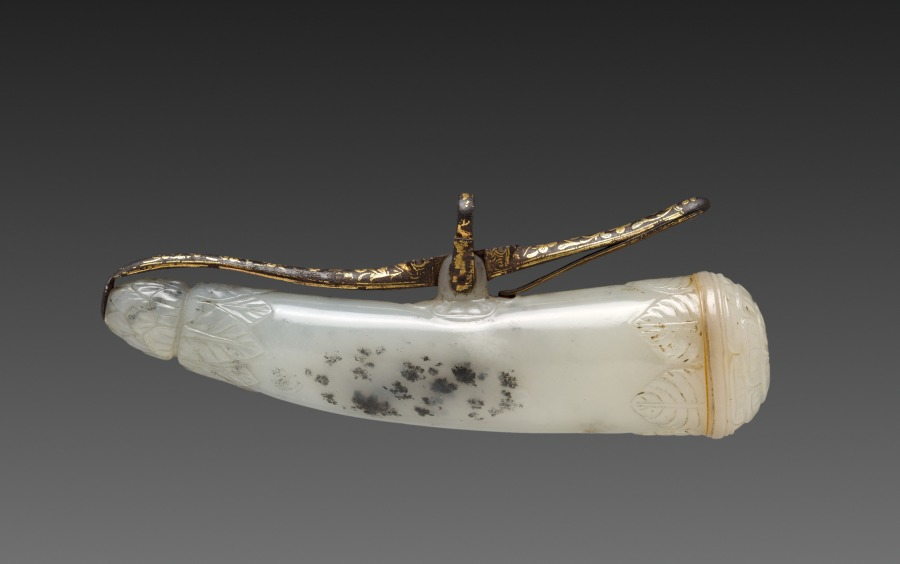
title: Powder horn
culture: India, Mughal, 17th-18th century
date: 1600s-1700s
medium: Jadeite, iron inlaid with brass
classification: Jade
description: Like the firearms themselves, powder horns were made as courtly accessories to be worn as objects of beauty. Most Mughal nobles also served as military commanders, and accouterments of war would be worn as part of their formal attire. For this reason, artisans used precious materials such as white jade, which in this example has been carved with leaf and petal patterns, its natural black inclusions treated as ornament. Pressing down on the simple mechanism opens the hollow inner chamber from which small amounts of gunpowder were administered into the pan of a matchlock musket.